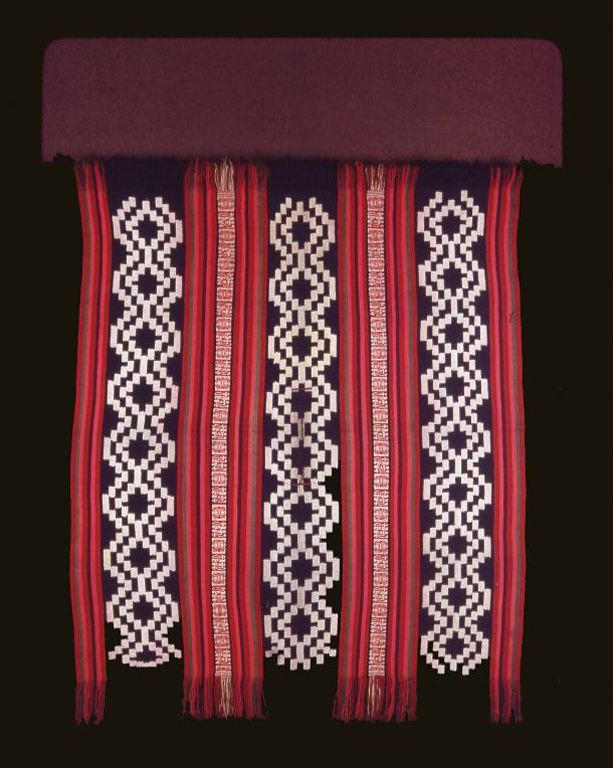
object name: Costume and Accessories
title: Chief's Poncho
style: Folk Art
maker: Mapuche (Chile)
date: 1850/1900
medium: Wool, stripes of plain weave, warp ikat plain weave, and-two color complementary warp weave; plied warp fringe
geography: Chile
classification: textile; weaving; costume